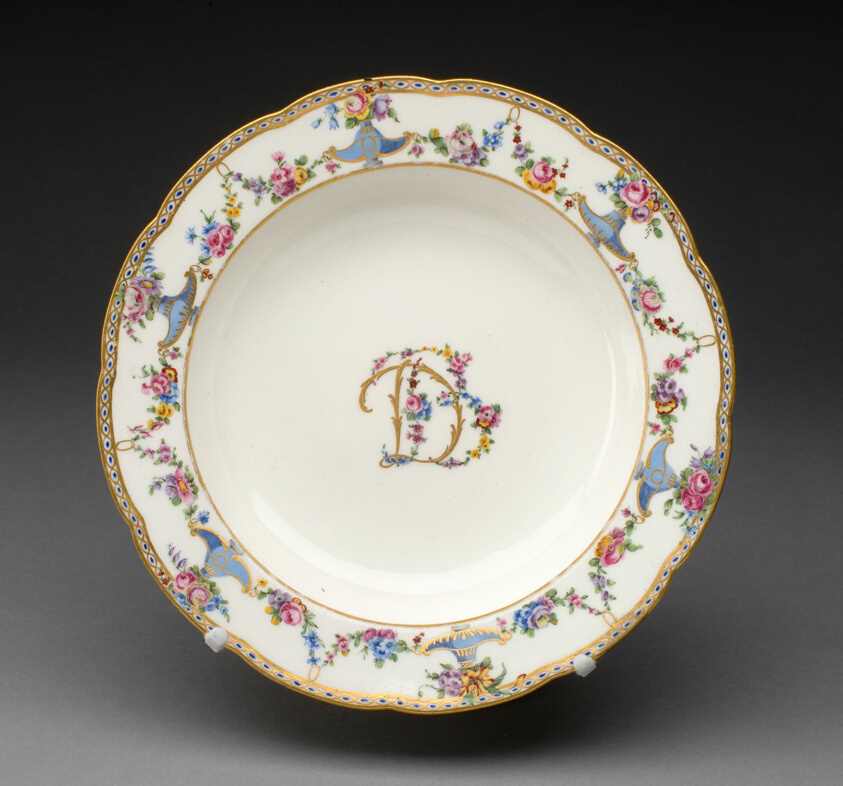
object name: Ceramics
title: Soup Plate from a service for Madame du Barry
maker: Sèvres Porcelain Manufactory; French, founded 1740; Painted by Nicolas Bulidon (French, active 1763–92)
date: 1771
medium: Soft-paste porcelain, polychrome enamels, and gilding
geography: Sèvres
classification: plate (general, dish); tableware; dish (vessel); ceramics; porcelain; european decorative arts